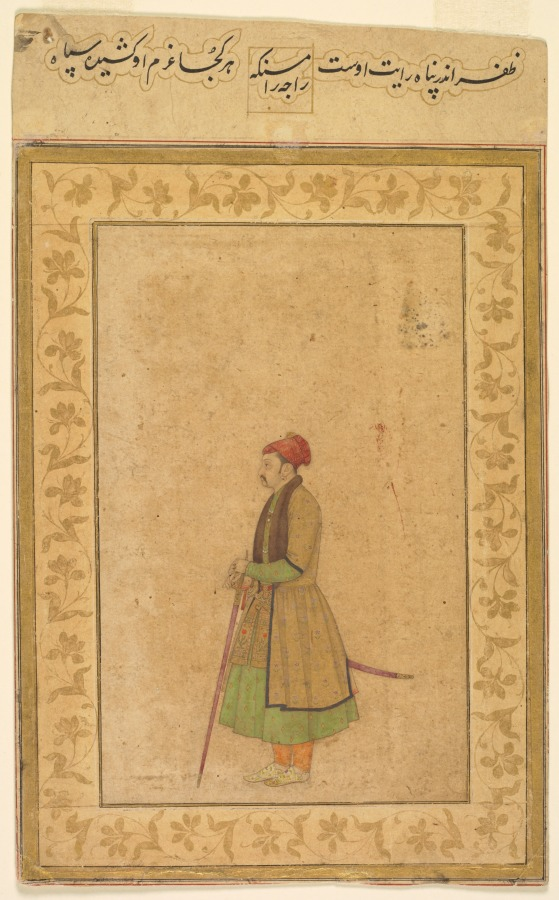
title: Portrait of Raja Ram Singh of Amber (r. 1667-1688) with a Deccan Sword (recto)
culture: India, Mughal, 17th century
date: c. 1680–85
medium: Gum tempera and gold on paper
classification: Painting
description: The sensitive, naturalistic rendering of weariness and forbearance in the face belies the trappings of favor bestowed on Ram Singh by the Mughal emperors Shah Jahan and Alamgir, whom he served as courtier and general between 1643 and 1688. He was a Hindu ruler from the kingdom of Amber in Rajasthan, under the control of the Mughal empire. Spending most of his life at the imperial court or leading military expeditions for the Mughals, this portrait was included in a Mughal album and inscribed with an Urdu verse indicating his value to the empire: "wherever he has led an expedition, victory is his." He wears a sumptuous coat of honor with a fur collar, woven with gold threads and floral sprigs and costly rubies, emeralds, and pearls. The straight sword with enameled hilt may be the one gifted to him by the emperor upon his succession to the throne as king of Amber in 1667. His long history of service at the imperial court, however, was checkered with troubles, including his allegiances with failed successors of Shah Jahan and the escape of the rebel Shivaji under his watch.